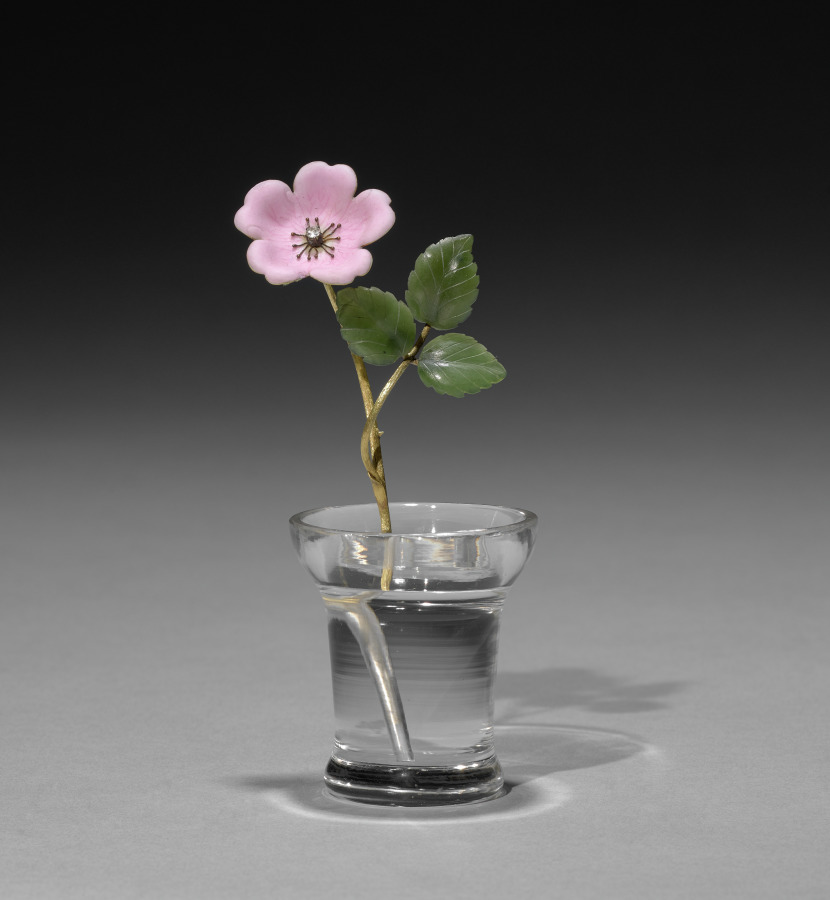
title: Flower Study of a Wild Rose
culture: Russia, St. Petersburg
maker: House of Fabergé (Russian, 1842–1918)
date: c. 1885–1915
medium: gold, silver, enamel, diamond, jade, rock crystal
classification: Miscellaneous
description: This delicate flower study resembles a stem of wild rose. Fabergé’s inspiration for his flower studies is said to have come from the floral brooches of precious stones that were made in the 1700s for Catherine the Great as well as from the Japanese art of flower arranging, known as ikebana. Small and delicate, Fabergé’s flower studies were given as intimate gifts to friends by the tsarina and others in the court. She also liked to take them around to wherever the imperial family was residing as a reminder of spring during the harsh Russian winters.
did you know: The stems of Fabergé’s flower studies are set into little basins carved from rock crystal to resemble pots of water.